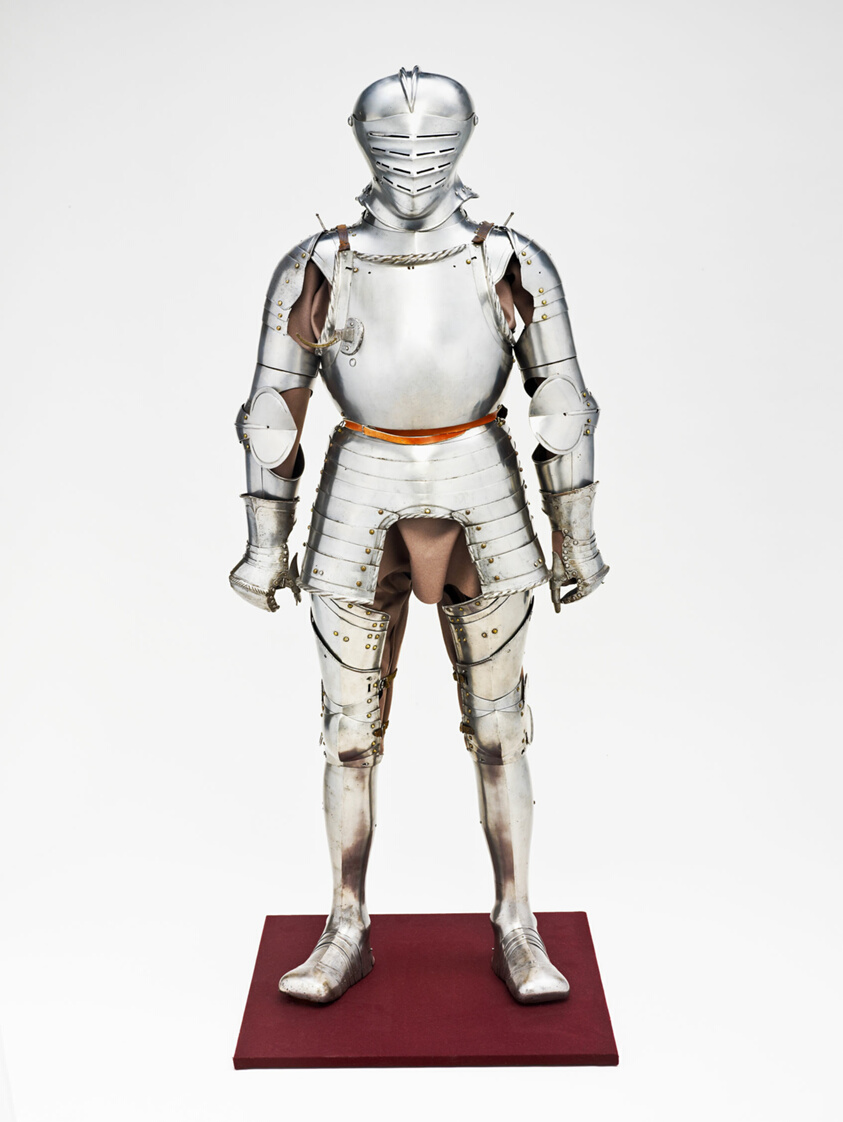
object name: Armor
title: Field Armor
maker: German, Augsburg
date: 1510/70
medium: Steel and leather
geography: Augsburg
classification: suit; armor; arms and armor